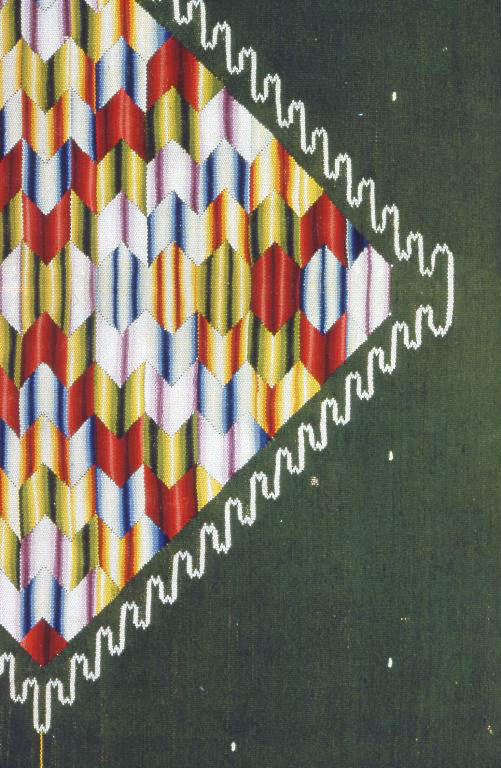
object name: Textile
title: Sarape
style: Folk Art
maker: Mexico, possibly Saltillo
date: 1850/1900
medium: Cotton and wool, slit tapestry weave with warp fringe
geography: Mexico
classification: textile; weaving